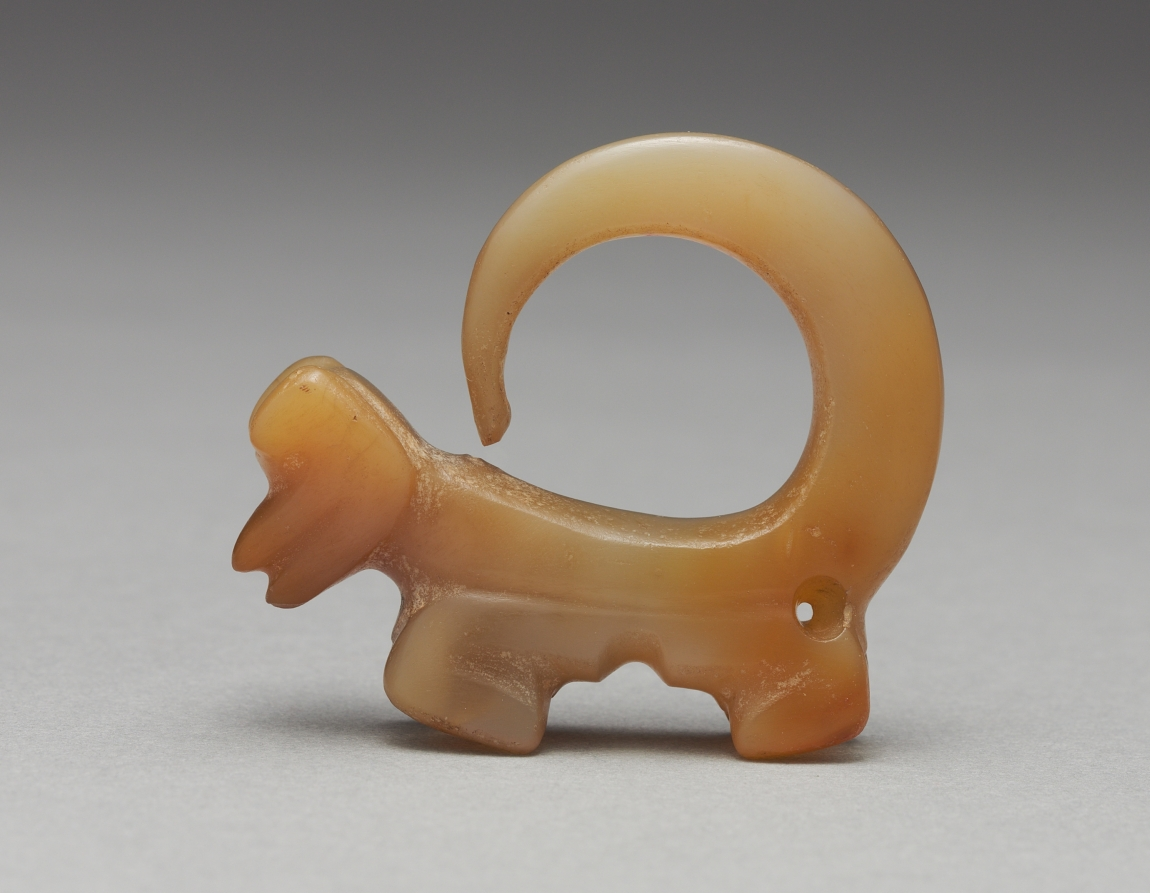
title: Curly-Tailed Animal Pendant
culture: Panama, Initial style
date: 100–800 CE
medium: agate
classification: Sculpture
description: A favored Initial-style subject is a charming animal whose curly tail-its most impressive feature-may derive from a monkey's. Its other traits vary considerably, causing it to be identified as everything from a dog to a duck. Initial-style gold ornaments represent Panama's oldest metalwork. Since metal technologies appeared suddenly and fully developed in Panama, it is likely that they were introduced from the outside, probably from Colombia to the south.